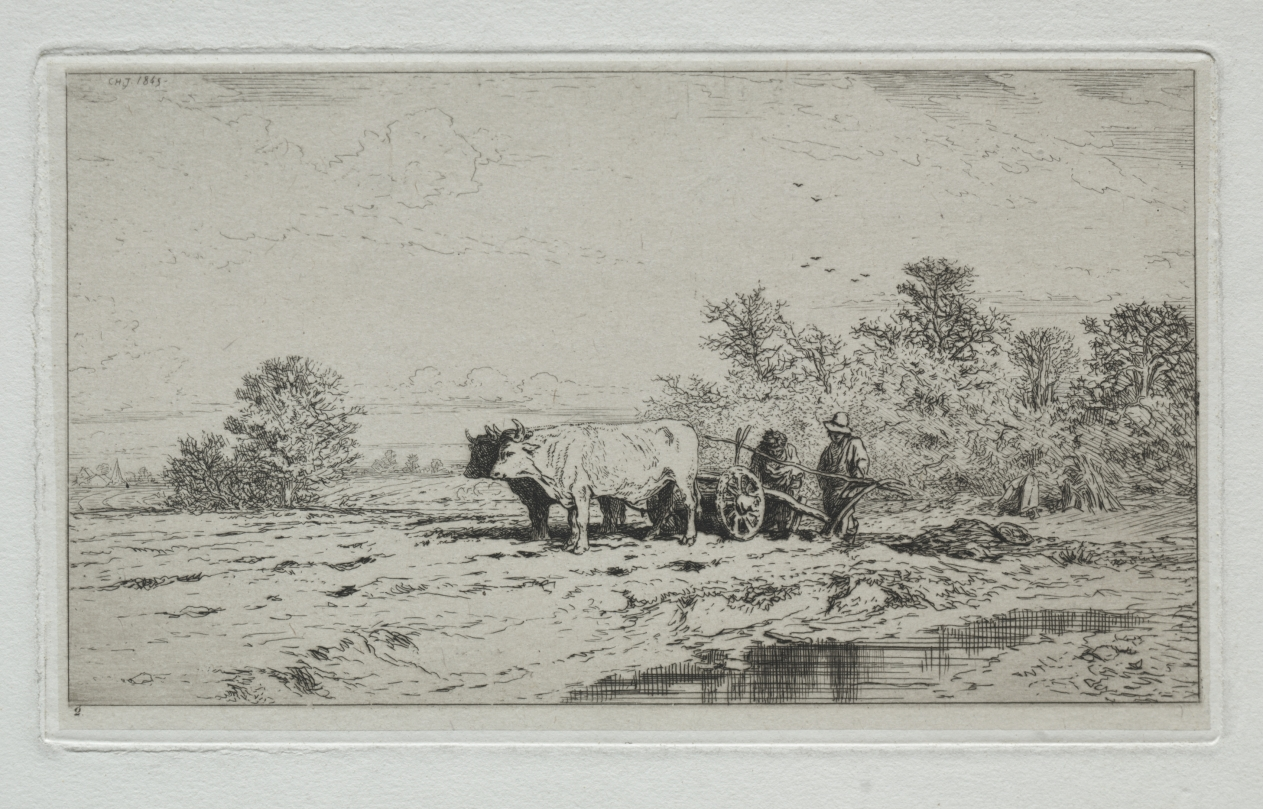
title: Landscape, Labourers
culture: France, 19th century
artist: Charles-Émile Jacque (French, 1813–1894)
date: 1845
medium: etching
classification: Print